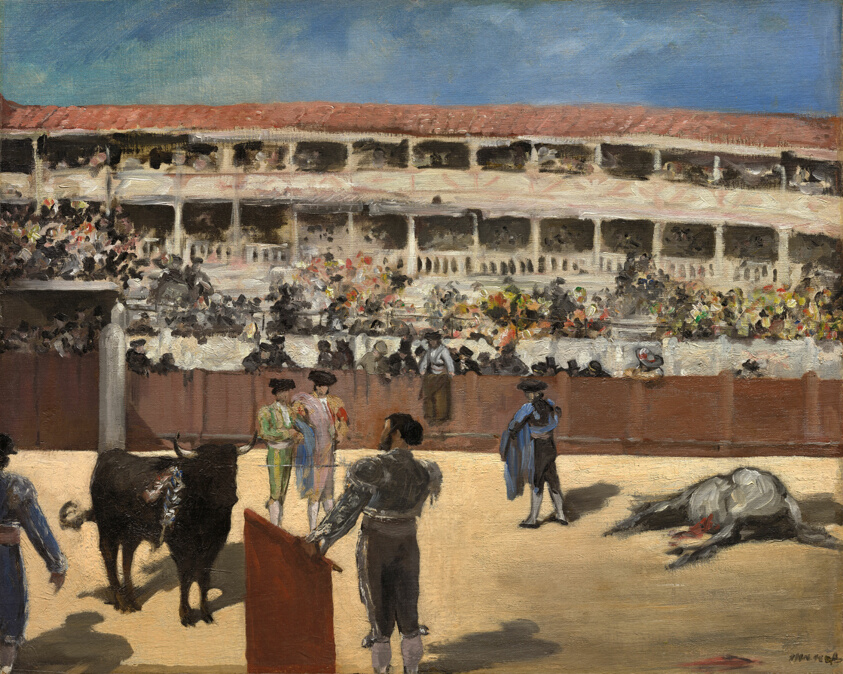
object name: Painting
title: Bullfight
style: Impressionism, 19th century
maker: Édouard Manet (French, 1832–1883)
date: 1865–66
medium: Oil on canvas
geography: France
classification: oil on canvas; french; paint; painting; european painting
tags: leisure, French, Spain, violence, figures, sports, bull, circles, work, men